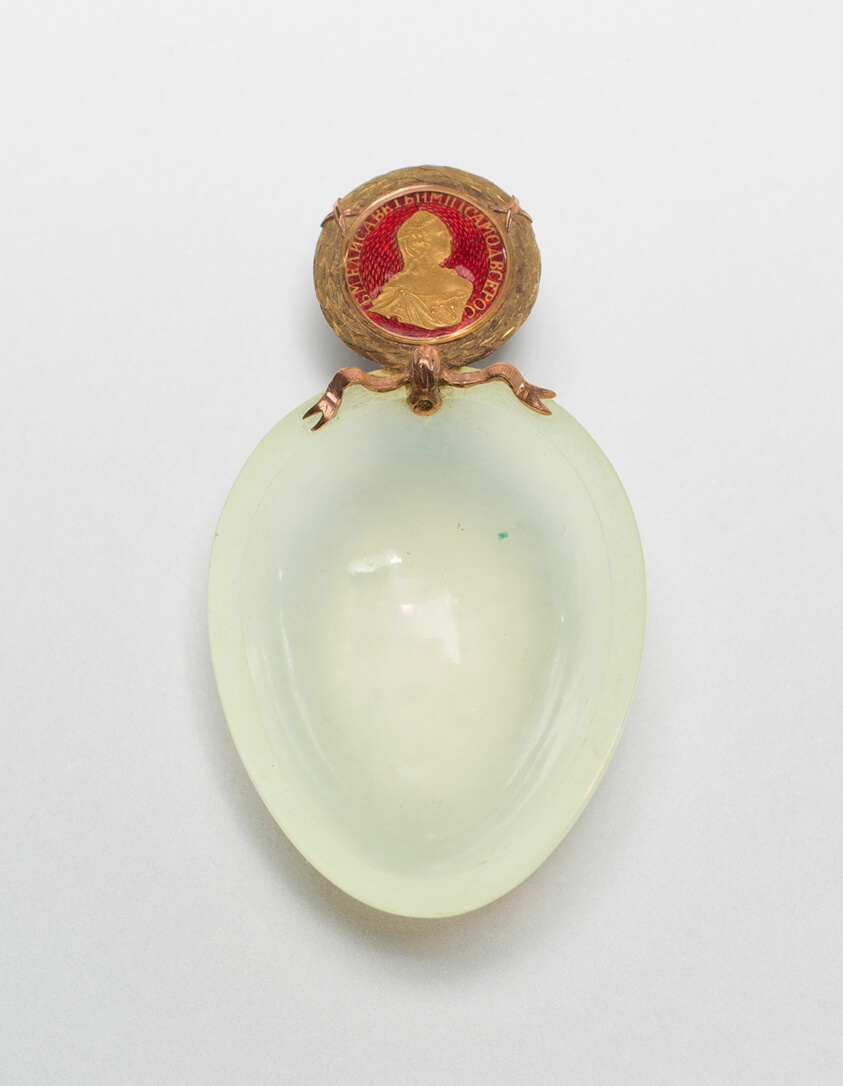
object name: Metalwork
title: Miniature Kovsh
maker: Fabergé Workshop; Moscow, Russia, 1842-1917; Master Craftsman: Henrik Wigstrom; Russian, early 20th century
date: c. 1900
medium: Bowenite and gold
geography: Moscow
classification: gold; metal; miniature; european decorative arts; metalwork